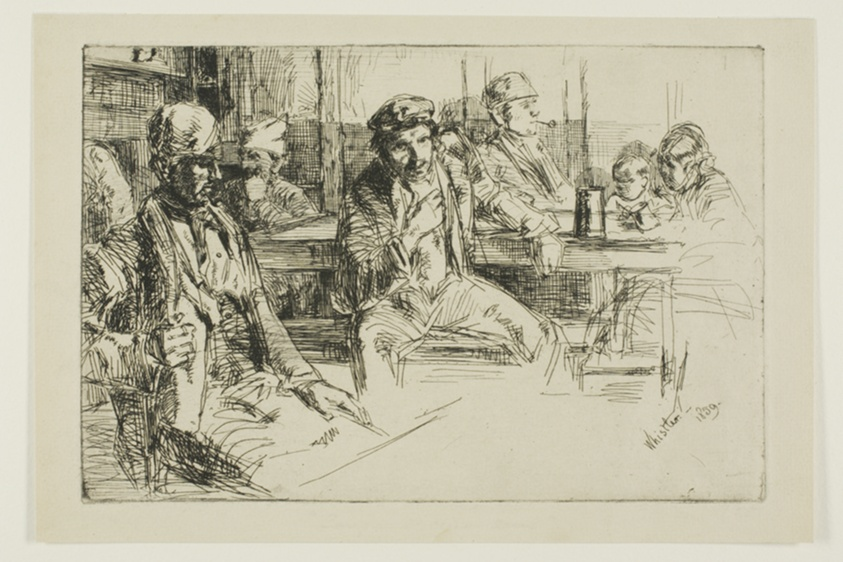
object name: Print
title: Longshore Men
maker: James McNeill Whistler (American, 1834-1903)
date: 1859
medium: Etching and drypoint in black ink on buff wove paper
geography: United States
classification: etching; print; prints and drawing; drypoint; paper